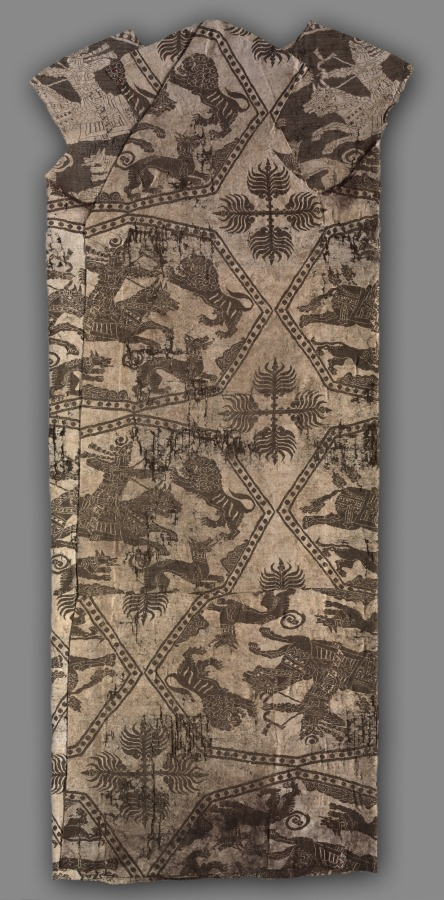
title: Fragments of a Caftan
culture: Iraq or Iran, in the style of the Buyid period (945–1055)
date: before 1982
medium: Silk: lampas weave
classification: Textile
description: These fragments from a caftan feature large-scale flattened octagons with pearled borders that contain a royal hunting scene: a king mounted on a running horse draws his bow at a rampant lion. Two dogs with their tongues out also run toward the lion. The star-shaped interspaces are filled with four radiating palmettes.